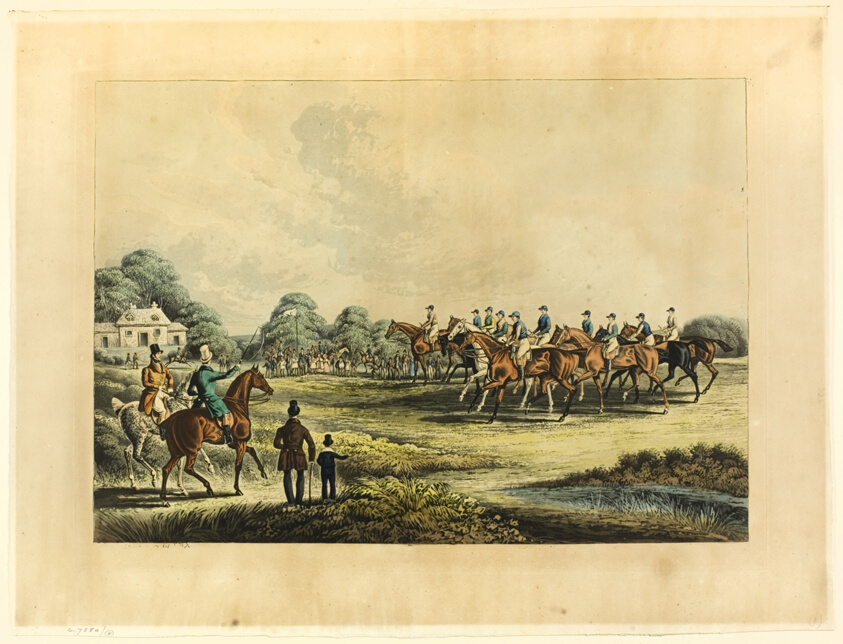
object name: Print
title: Saint Albans Grand Steeple Chase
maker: after James Pollard; English, 1797-1867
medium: Etching and aquatint, with hand-coloring, on paper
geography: England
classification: aquatint; print; prints and drawing